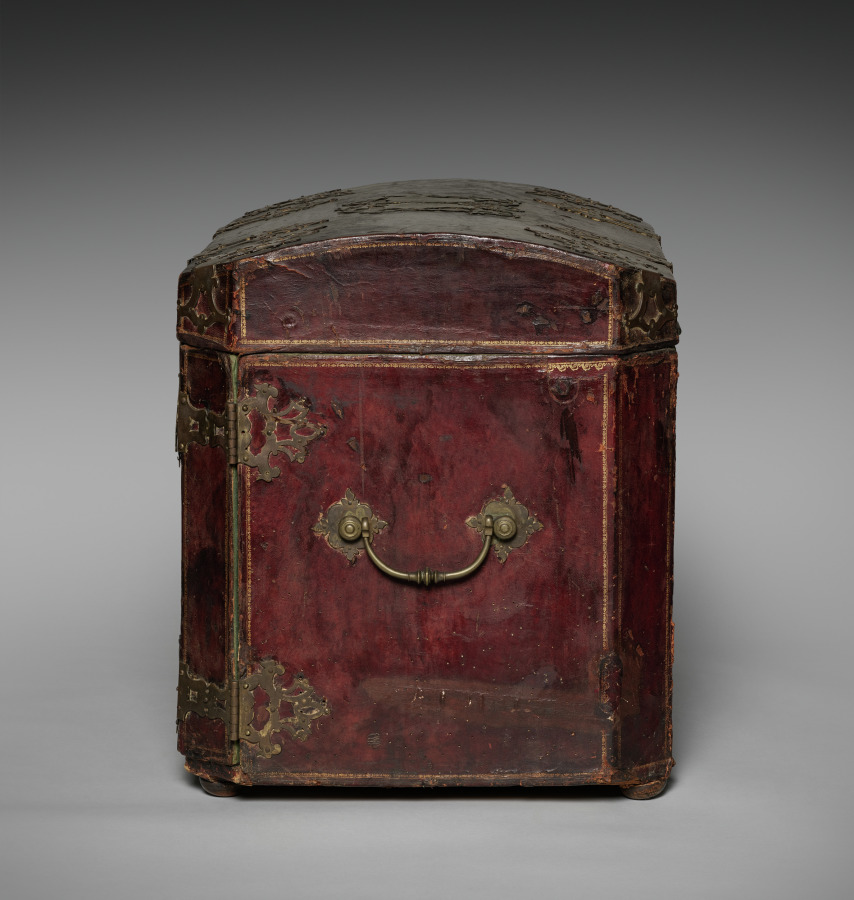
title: Chest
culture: Italy, Venice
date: 1700s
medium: leather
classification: Miscellaneous